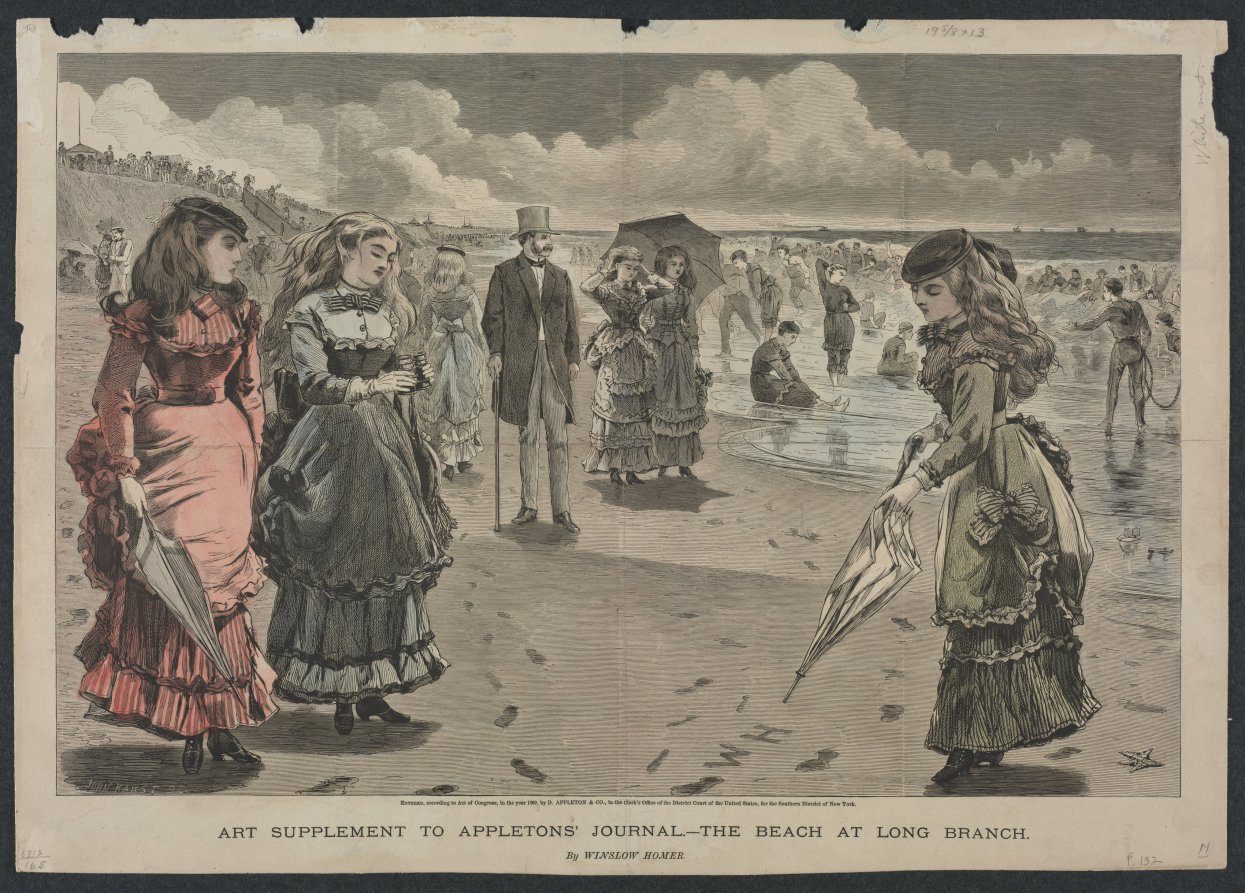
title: The Beach at Long Branch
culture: America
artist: Winslow Homer (American, 1836–1910)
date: 1869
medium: wood engraving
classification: Print